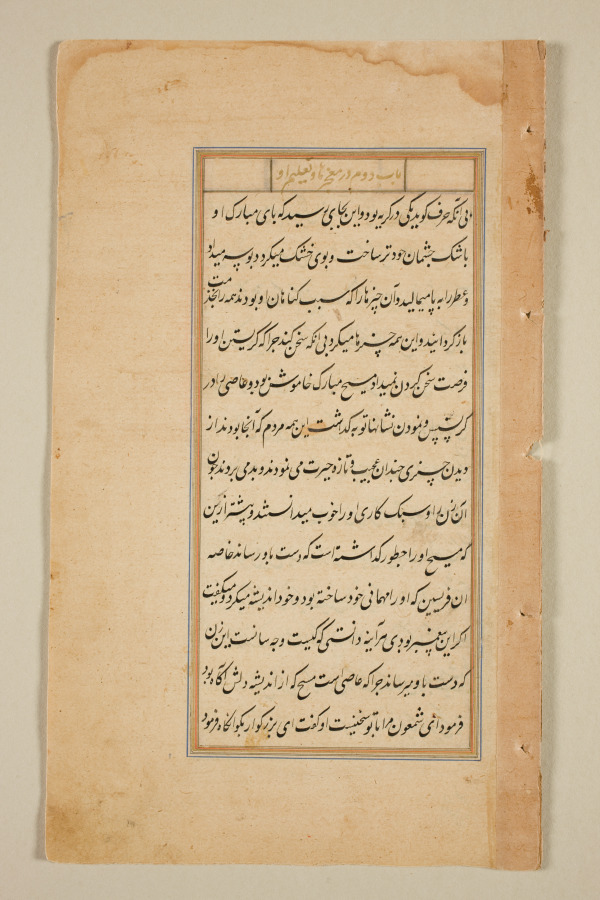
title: Text page from a Mirror of Holiness (Mir’at al-quds) of Father Jerome Xavier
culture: Mughal India, Allahabad, made for Prince Salim (1569–1627)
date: 1602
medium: Ink and gold on paper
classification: Manuscript